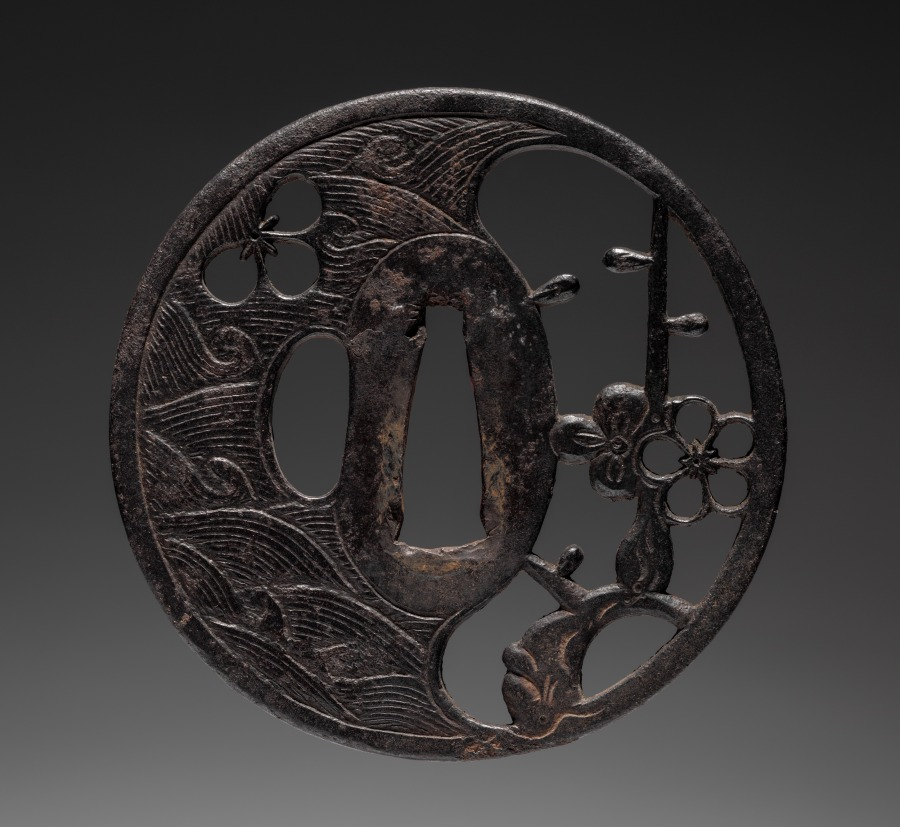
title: Sword Guard (Tsuba) with Plum and Waves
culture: Japan, possibly Edo period (1615-1868)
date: c. 1615–1868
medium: iron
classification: Arms and Armor